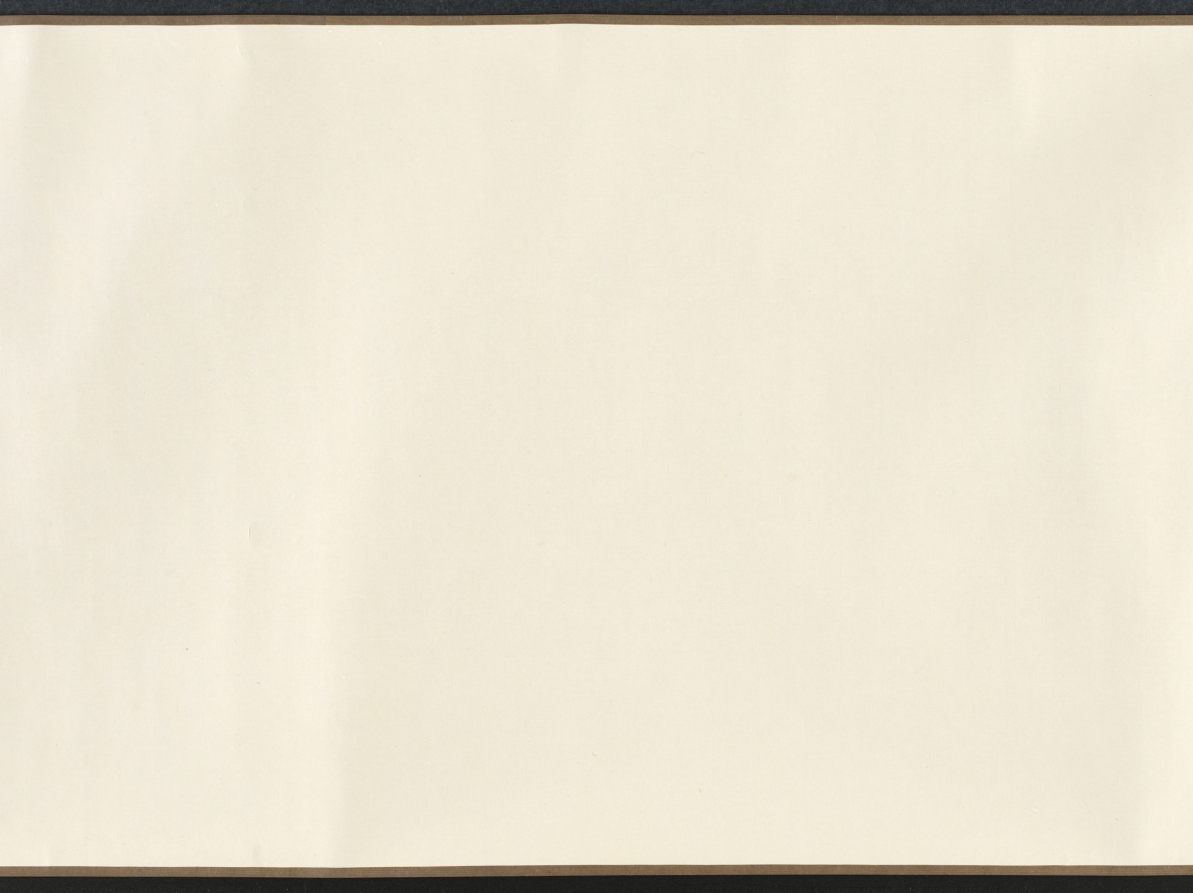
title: Ink Flowers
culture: China, Yuan dynasty (1271-1368)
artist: Zhao Zhong (Chinese, second half of the 1300s)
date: 1361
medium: Handscroll; ink on paper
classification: Painting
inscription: 寶帶同心結，香羅合歡扇。/ 繡作錦鴛鴦，雙雙為君獻。/ 薔薇露灑熏籠衣，馨香奉君君勿違。 原初并題。 [印] 趙衷原初畫記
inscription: 翠袂素羅韈，玉臺黃金盃。浩歌渡弱水。天風卷海三山開，麻姑方平為招飲，蛟宮獻舞銀濤堆。 原初并題。 [印] 雲林清趣、[印] 趙衷原初畫記。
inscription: 右用湯叔雅慶元中所寫墨花法作此卷，又效李長吉體賦詩以題之。詩與畫雖未工，要皆出於古人之餘，譬猶欲成方圓而必求其規矩之用也，識者毋誚焉！至正辛丑八月望日，東吳野人趙衷原初謹識。 [印] 趙原初、[印] 傳世清玩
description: Zhao Zhong's flowers, each paired with a poem, echo the fine-style colored flowers of the academic tradition, but instead he used only ink. Fine lines define the contours of each plant, as well as the veins within each petal and leaf. Careful ink washes give subtle modeling to the forms. The combination of lily, narcissus, and peony is unusual as the three belong to no known seasonal or symbolic system popular in the fourteenth century. Zhao’s medical training may have influenced the selection. Powdered lilies, for example, were prescribed to dispel grief, while the bark of tree peony roots was used as a treatment for various blood disorders.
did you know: This handscroll is a very rare example of ink flowers in the linear baimiao style of the fourteenth century.